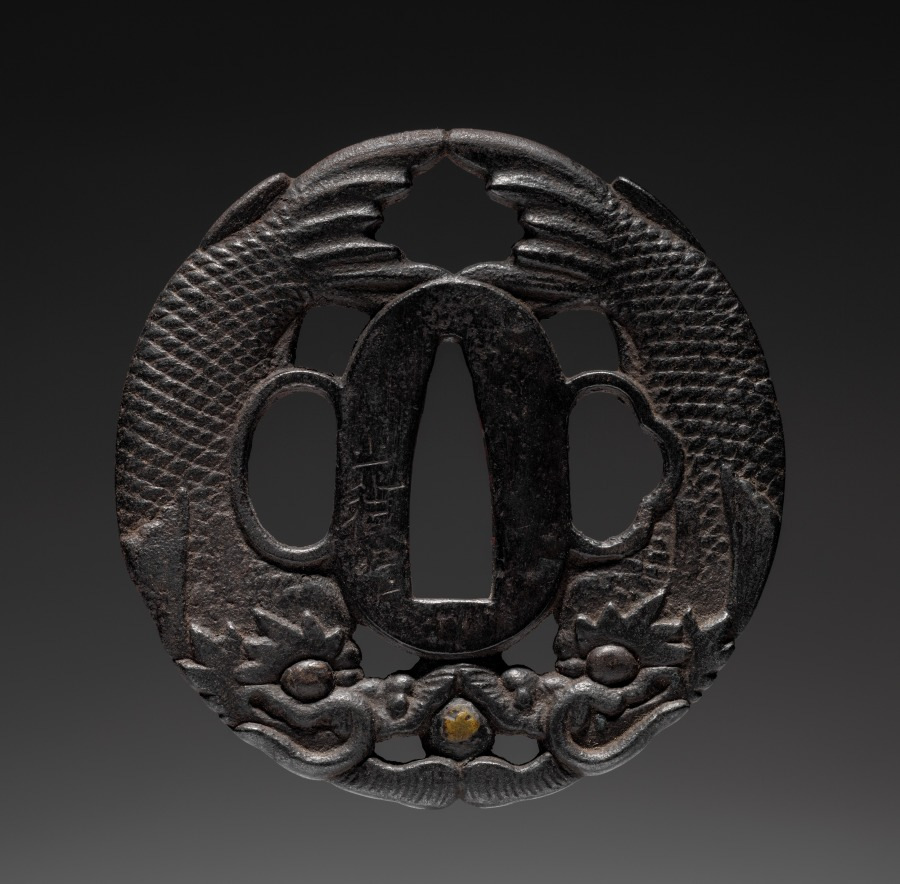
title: Sword Guard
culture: Japan, Edo period (1615–1868)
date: mid-1800s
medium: iron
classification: Arms and Armor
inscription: Signature: Mitsunori made